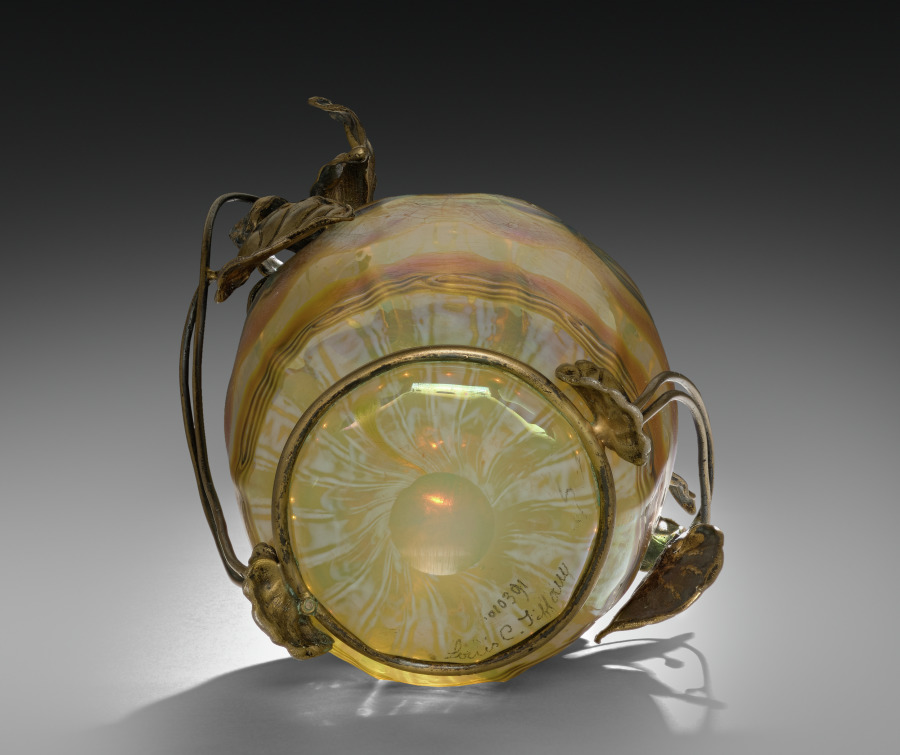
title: Vase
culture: America, New York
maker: Tiffany Glass & Decorating Company (America, New York, 1892–1902)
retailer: Siegfried Bing (German, active in France, 1838–1905)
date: c. 1900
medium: Favrile glass, silver mount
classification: Glass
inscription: Louis C. Tiffany o10301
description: This small vase is made of Louis Comfort Tiffany's signature Favrile glass. Early on when Tiffany began collaborating with glass artists on new types of production, his aesthetic ambitions were realized in the development of Favrile glass, deliberately named to sound French, expensive, and “handmade.” Largely through Tiffany's marketing ability, Favrile glass became America’s greatest contribution to the Art Nouveau style. His works were exhibited at international expositions; galleries in major European cities, where his creations were bought by many museums; and in his store in Manhattan, known as the Tiffany Glass and Decorating Co., later Tiffany Studios. Along with the many shapes and sizes of his decorative vases, Tiffany used Favrile glass in mosaic panels, stained glass windows, and his artistic line of table and floor lamps.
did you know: This vase has French mounts indicating that it was likely sold by Louis Comfort Tiffany's agent in Paris, Siegfried Bing, who helped popularize Tiffany's designs throughout Europe.